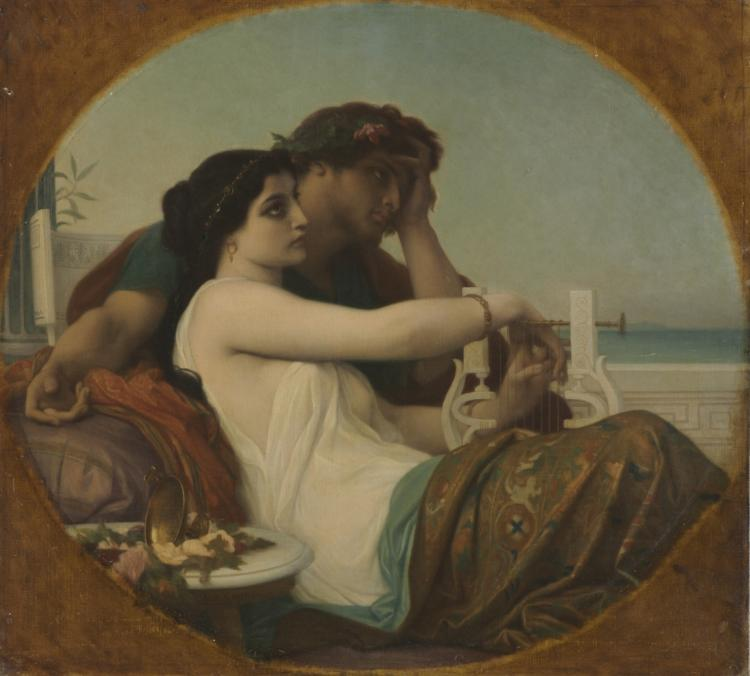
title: Aglaida and Boniface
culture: France, 19th century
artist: Alexandre Cabanel (French, 1823–1889)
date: c. 1857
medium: oil on canvas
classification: Painting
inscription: Signed lower right: "Alex Cabanel"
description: The French painter Alexandre Cabanel was a favorite of Emperor Napoleon III and a leader of the academic style that emphasized precise drawing and smoothly modeled forms. This painting depicts the wealthy Roman woman Aglaida and her concubine slave Boniface, here living as pagan sinners in Rome around 290 CE. On a trip to Tarsus on the Anatolian coast, Boniface converted to Christianity and was tortured and beheaded. Aglaida also converted to Christianity, gave all her possessions to the poor, and built a church for Boniface's relics.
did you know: Alexandre Cabanel was a leader of the academic artists who rejected the paintings of Édouard Manet and other "realists" from the Salon of 1863, producing a vast outcry that forced the government to organize the alternative Salon des Refusés.